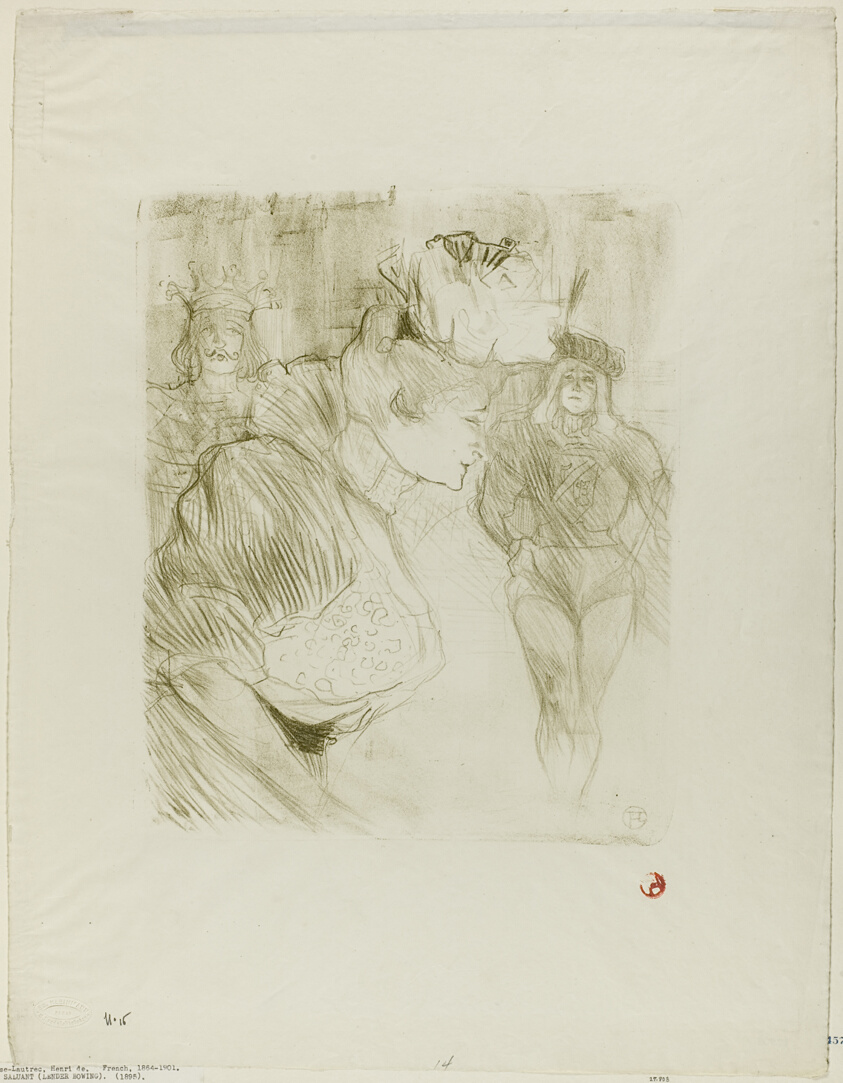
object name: Print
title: Lender Taking a Bow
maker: Henri de Toulouse-Lautrec (French, 1864-1901)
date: 1895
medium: Color lithograph on ivory wove paper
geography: France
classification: lithograph; print; prints and drawing